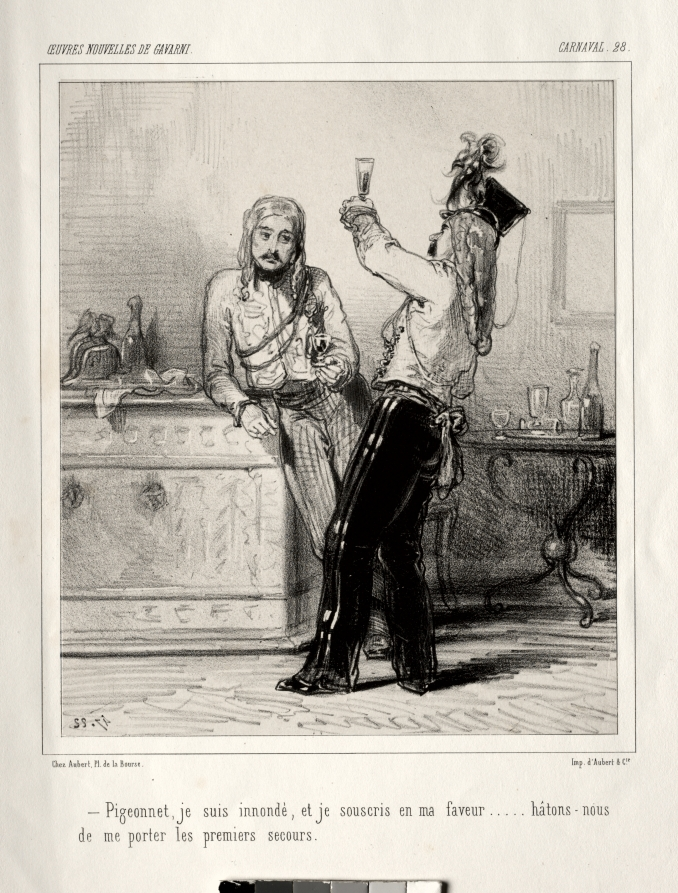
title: Carnaval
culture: France, 19th century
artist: Paul Gavarni (French, 1804–1866)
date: c. 1841–47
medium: lithograph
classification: Print